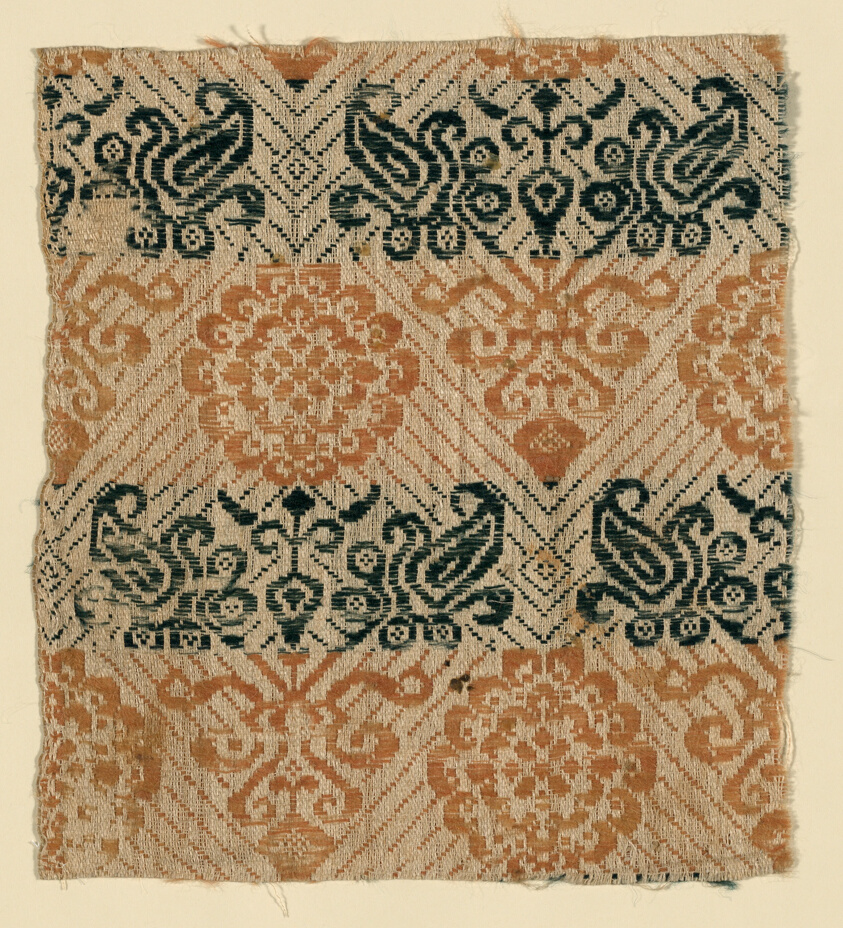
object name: Textile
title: Fragment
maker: Europe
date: 1650/1700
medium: Linen and wool, plain weave with supplementary weft floats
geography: Europe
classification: textile; weaving